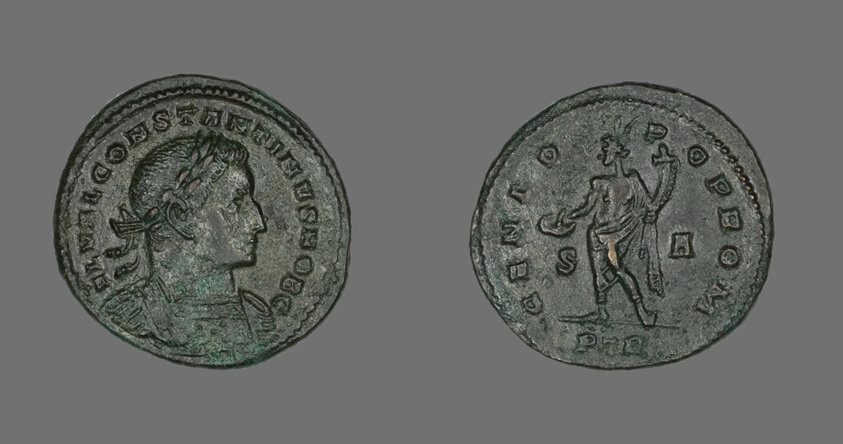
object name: Coin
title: Coin Portraying Emperor Constantine I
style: roman (ancient, style or period)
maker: Roman, minted in Trier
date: 307-337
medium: Bronze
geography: Trier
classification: coin; ancient art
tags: portrait